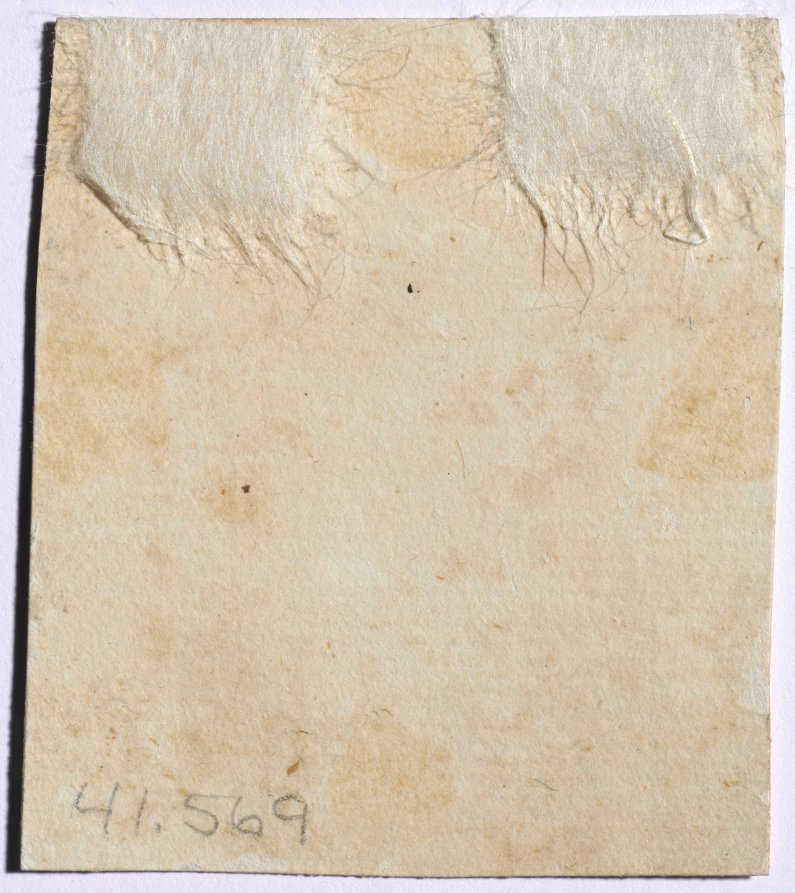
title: Portrait of a Woman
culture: England, 18th century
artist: John I Smart (British, 1741–1811)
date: c. 1772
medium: graphite and wash on laid paper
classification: Portrait Miniature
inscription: inscribed on paper backing: in graphite, upside down at top: 134; in graphite on slant below center: Eleanor of / Spain; on the inside of the outside backing, in center in graphite: M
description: Although it is impossible to say if it was always part of the artist’s process to execute a preparatory sketch prior to painting each miniature, we do know that John Smart retained many hundreds of these sketches. A group of preparatory sketches—of which this portrait is one—descended through the Smirke family after Smart’s daughter Sarah gave a sketchbook containing preparatory portrait studies to her friend Mary Smirke, sister of the celebrated Victorian architect Sydney Smirke. This book was probably broken up around 1877 when it was divided between Sydney’s daughters Mary Jemmett and Mrs. Lange, whose portions were both sold at auction in 1928. This portrait was assigned the historically colorful but fictitious title of “Eleanor of Spain” at some point after memory of its true identity had been lost. Giving illustrious titles to portraits of unknown sitters was a popular strategy adopted by dealers during the nineteenth and twentieth centuries, often applied to miniature portraits and, in particular, to Smart’s sketches of women. The inscription on the paper backing is not in Smart’s hand, and when the paper backing was removed in 1993, no inscriptions were discovered on the back of the drawing itself. Only the sitter’s head and neck are drawn, and a low-necked dress is faintly suggested. Her head is turned to the right, and her light-colored hair is dressed high, with flat curls against the back of her head. She has blue eyes, and the color of her lips is extremely faded, as is the miniature overall. The sitter’s sagging jaw line and the lines beneath her eyes suggest that she was painted as a mature woman. The background is unpainted. A photograph of this sketch in Edward Greene’s notebook indicates that at one time “134” was inscribed on the front in the upper right corner. To this date, the finished ivory for which this preparatory sketch was presumably undertaken has not been discovered. A miniature from the Nelson-Atkins Museum of Art’s Starr collection, while probably not this sketch’s finished ivory counterpart, is closely related in style and date. The Nelson-Atkins unidentified sitter’s veiled hairstyle, position of the head in relation to her squared shoulder, and plump jaw line are identical to the Cleveland sketch. During this stage of Smart’s career, the sitters’ heads were often rather large in relation to their bodies.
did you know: Sketches helped John Smart work out the particulars of a portrait before commencing the miniature on ivory; they were useful in the event that a duplicate might later be required.